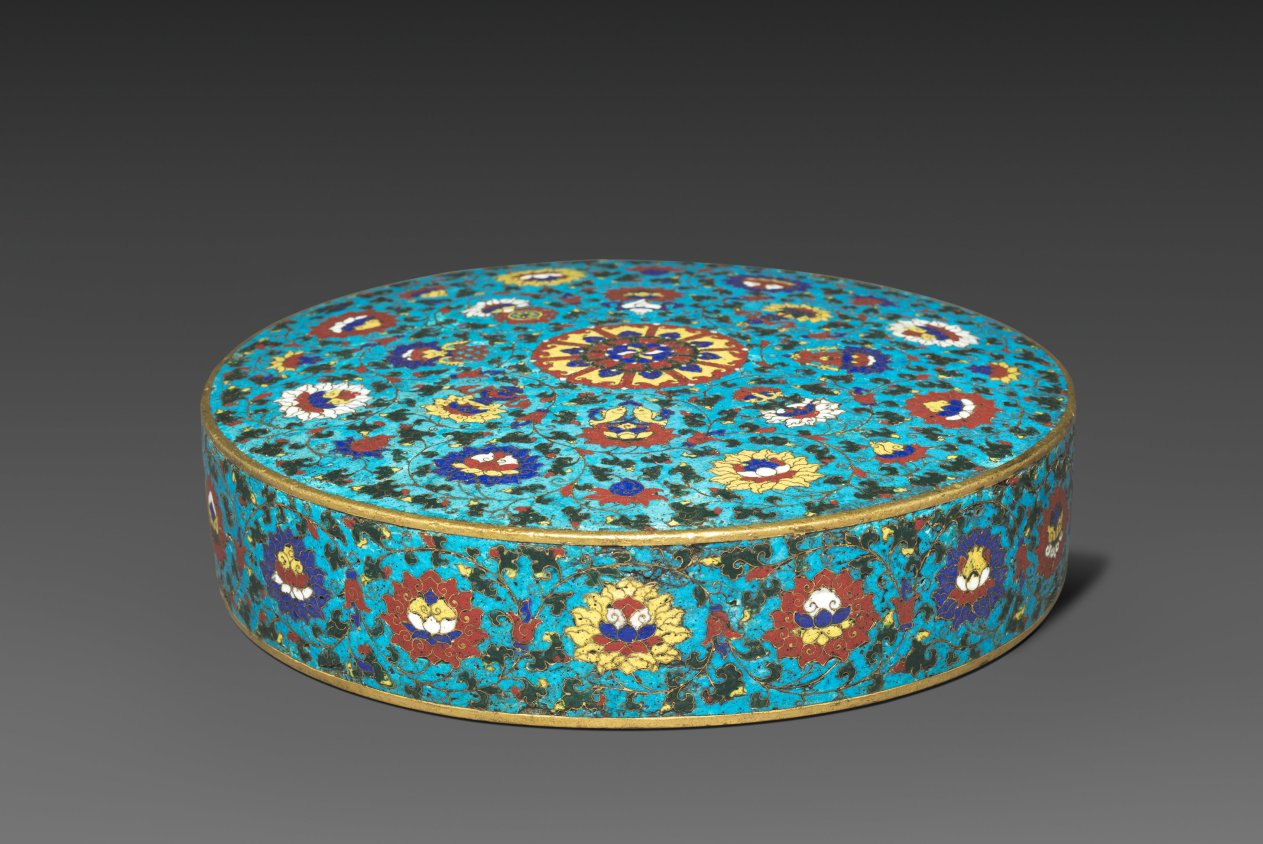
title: Mandala Base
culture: China, Ming dynasty (1368–1644)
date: early 1400s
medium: cloisonné enamel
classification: Enamel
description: A ritual object of Tibetan Buddhism, this cloisonné disc is used as the base for a three-dimensional mandala composed of miniature buildings. The decoration includes the lotus flowers and the Eight Buddhist Treasures: the wheel, the conch, the umbrella, the canopy, the lotus, the paired fish, the vase, and the endless knot.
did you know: In a meditation ritual known as Offering the Universe, the disc functioned as a mandala or cosmic diagram.